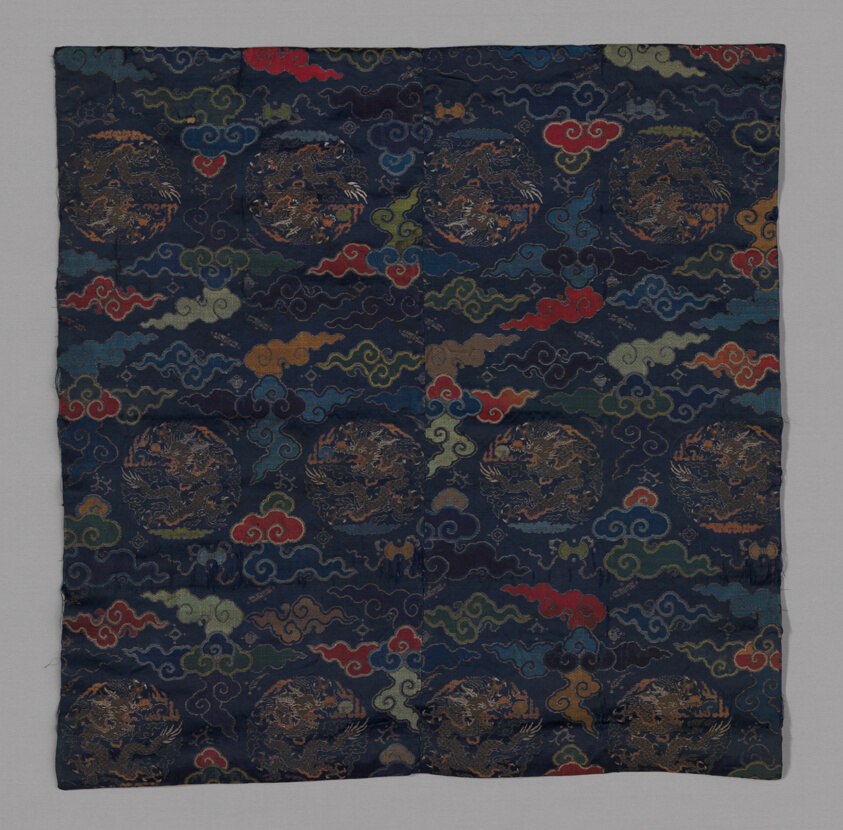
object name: Religious/Ritual Object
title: Uchishiki (Altar Cover)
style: Japanism, asian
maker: Japan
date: Meiji period (1868–1912), 1875/1900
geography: Japan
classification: textile; weaving; liturgical - buddhist; ritual objects